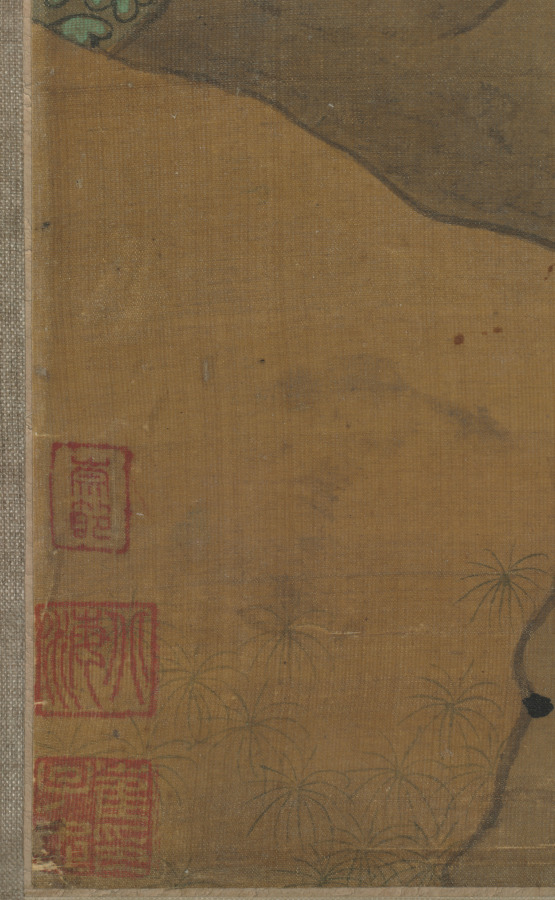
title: Xu Jingyang Moving His Family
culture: China, Ming dynasty (1368–1644)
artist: Cui Zizhong (Chinese, 1574–1644)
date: 1644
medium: Hanging scroll; ink and color on silk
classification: Painting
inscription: Artist's 2 seals: Pei-hai, Cui Zizhong yin.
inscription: 9 additional seals: 2 of Xiang Yuan (18th-19th c.); 1 of Tang Zuomei (late 18th-19th c.); 1 of Zhang Heng 張珩 (1915-1963); 1 of C. C. Wang 王季遷 (1907–2003); 4 unidentified.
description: Xu Jingyang was a dedicated fourth-century Confucian official who allegedly turned into a Daoist immortal. This scroll depicts the legend that when he attained immortality, he took his entire household, including chickens and dogs, to paradise. Cui Zizhong’s painting style intentionally referenced ancient masters. Typical of the pre-Song dynasty landscape tradition, there is the use of blue and green colors and an emphasis on outline rather than texture. While the trembling outlines are reminiscent of earlier painters, the flickering light on rocks and trees is a stylistic feature of Cui’s own time.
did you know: Xu Jingyang, wearing red, is in the upper register of figures, while below his servants transport a rooster, dog, and other supplies.